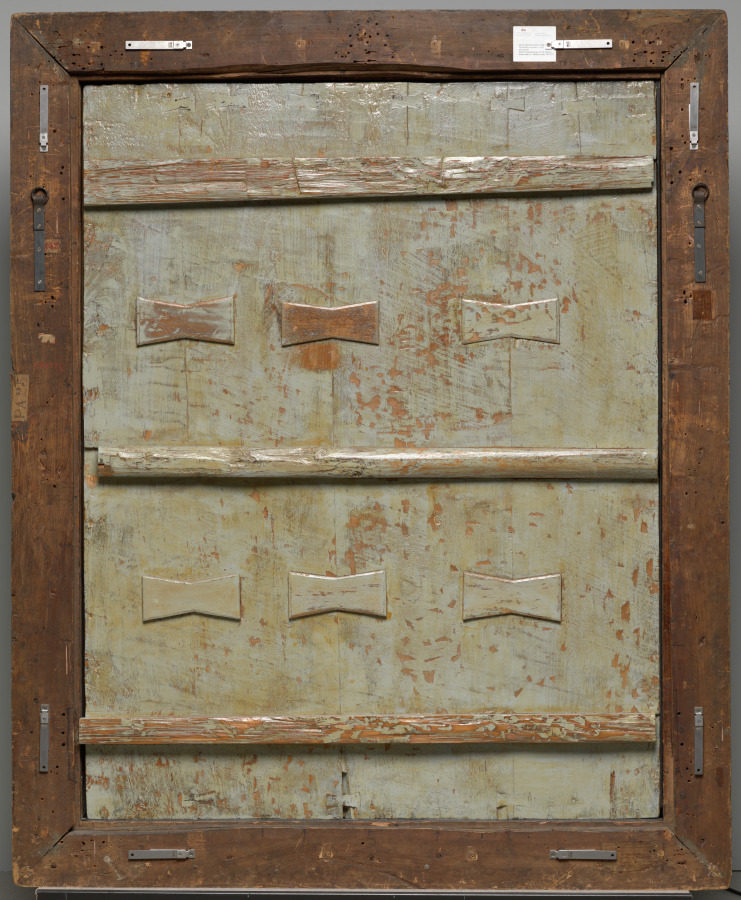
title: The Sacrifice of Isaac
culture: Italy, Florence, 16th century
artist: Andrea del Sarto (Italian, 1486–1530)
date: c. 1527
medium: oil on wood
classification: Painting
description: In this dramatic test of faith from the Old Testament book of Genesis, Abraham agrees to slay his son Isaac on God’s command. As Abraham raises the knife, an angel suddenly appears to halt the sacrifice. This work gains its power from the complex expressions of father and son, combining grief, strength, resignation, fear, and realization in their faces and bodies, the latter inspired by ancient sculpture and Michelangelo. Andrea del Sarto never finished this painting, and it lays bare his working methods. He transferred the design to the panel from a drawing, reinforcing the chalk with painted lines—best seen in the donkey at the far right. He then worked over the whole panel at once with thin, brushy veils of color, letting him alter the composition while painting—especially evident in the angel, Isaac’s body, and Abraham’s head.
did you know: The angel has two visible sets of legs, showing the artist’s revision of the composition.